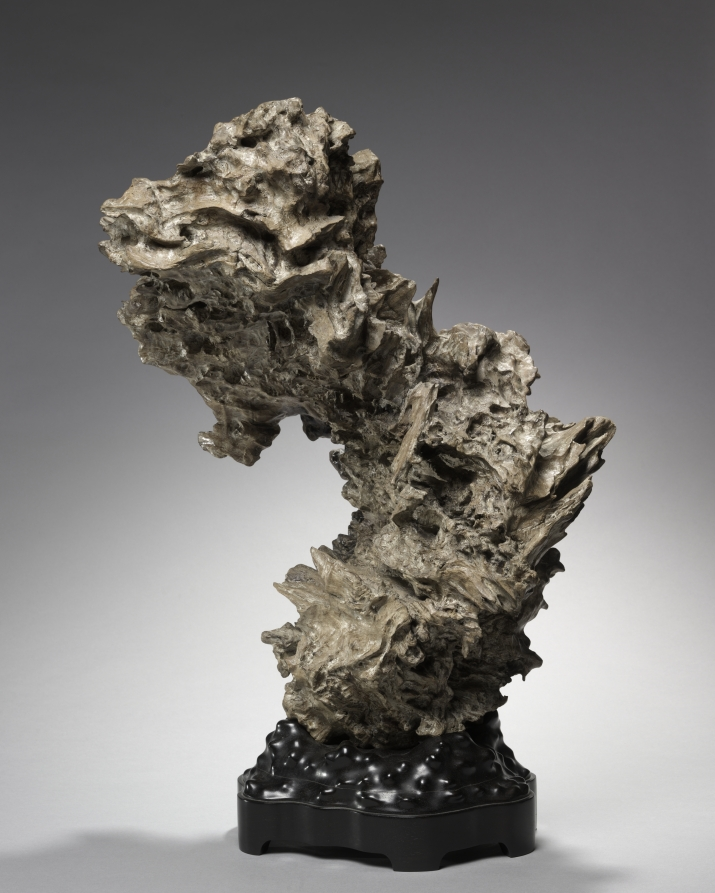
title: Tree Root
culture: China, Qing dynasty (1644-1911)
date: before 1800s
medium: wood with carved base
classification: Miscellaneous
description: Here, the twists and turns, ebb and flow of the natural form of the tree root can be interpreted as the energy that gives life and the endless transformations in the universe. The rugged appearance is appreciated for its association with the aesthetic concepts of eccentricity and archaism in Chinese art.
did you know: Root sculptures are shaped by the inherent nature of the root rather than being carved.